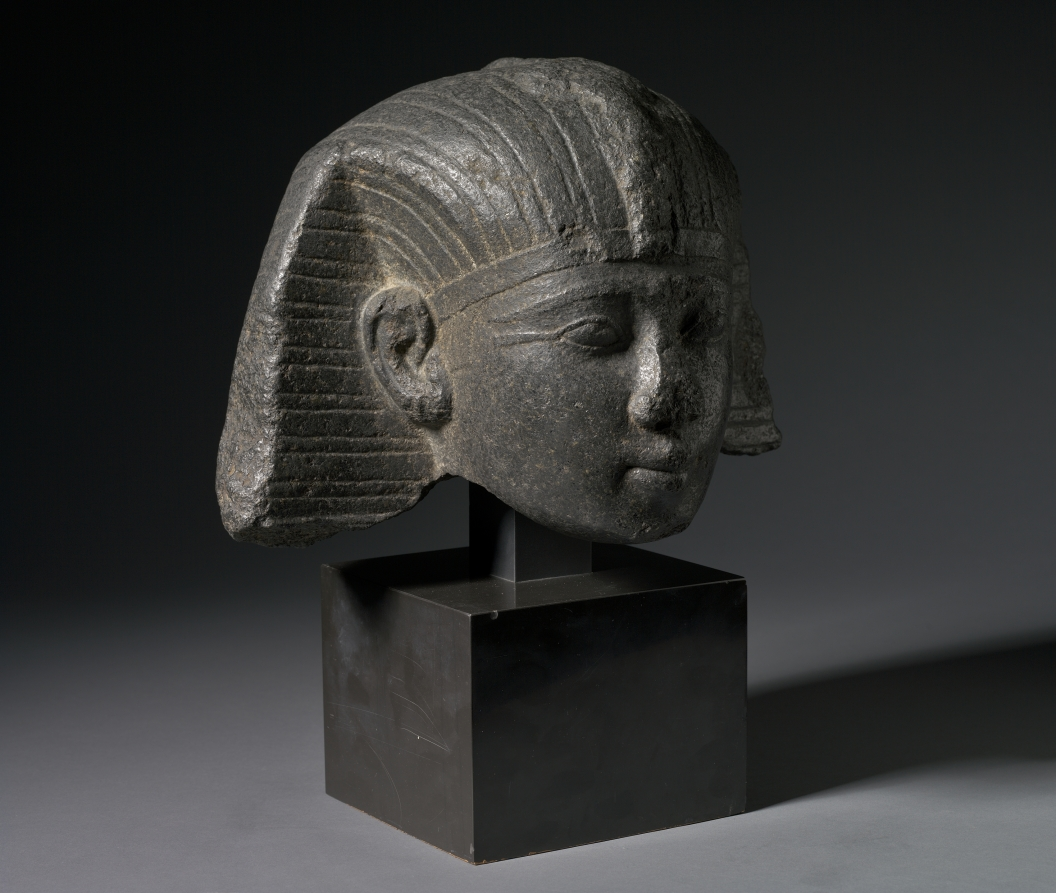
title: Head of a King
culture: Egypt, Third Intermediate (1069–715 BCE), Dynasties 21–22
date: c. 1069–715 BCE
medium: granodiorite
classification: Sculpture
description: This head was the first Egyptian royal sculpture to enter the museum. Although regal in appearance, the rather generalized facial features are not indicative of any specific ruler. It appears to be a work of the Third Intermediate Period, when artists drew inspiration from the elegant, idealizing style of the 18th Dynasty.